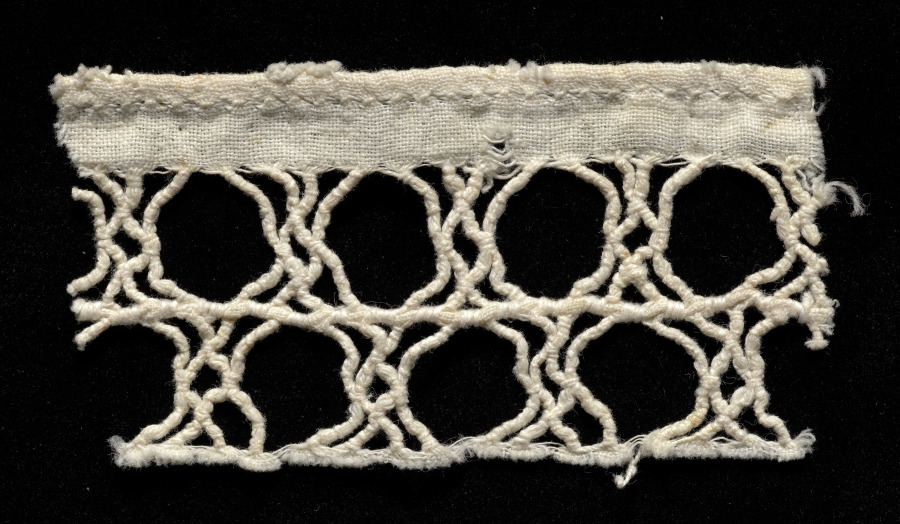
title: Fragment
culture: Spain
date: 1760–1899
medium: Cotton(?): needle lace (drawnwork)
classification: Lace